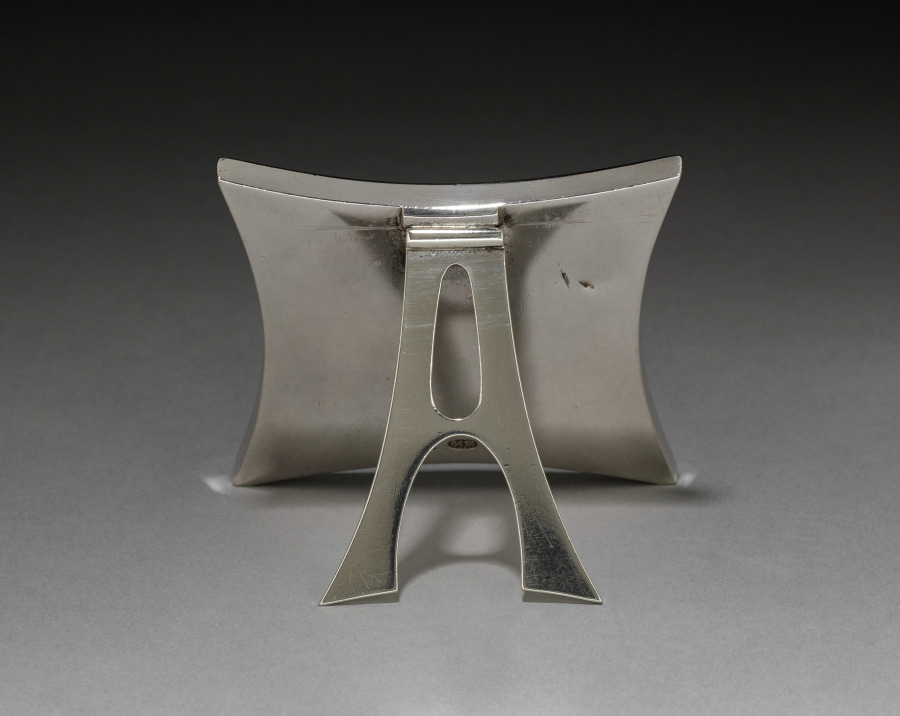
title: Frame with Portrait Miniature of Princess Yusopov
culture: Russian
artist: House of Fabergé (Russian, 1842–1918)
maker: Philip Theodor Ringe (Russian, 1824–1882)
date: c. 1893–96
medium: silver, ivory, watercolor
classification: Silver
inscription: Cyrillic initials “TR”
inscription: “84” silver standard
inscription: St. Petersburg coat of arms (crossed anchors and scepter)